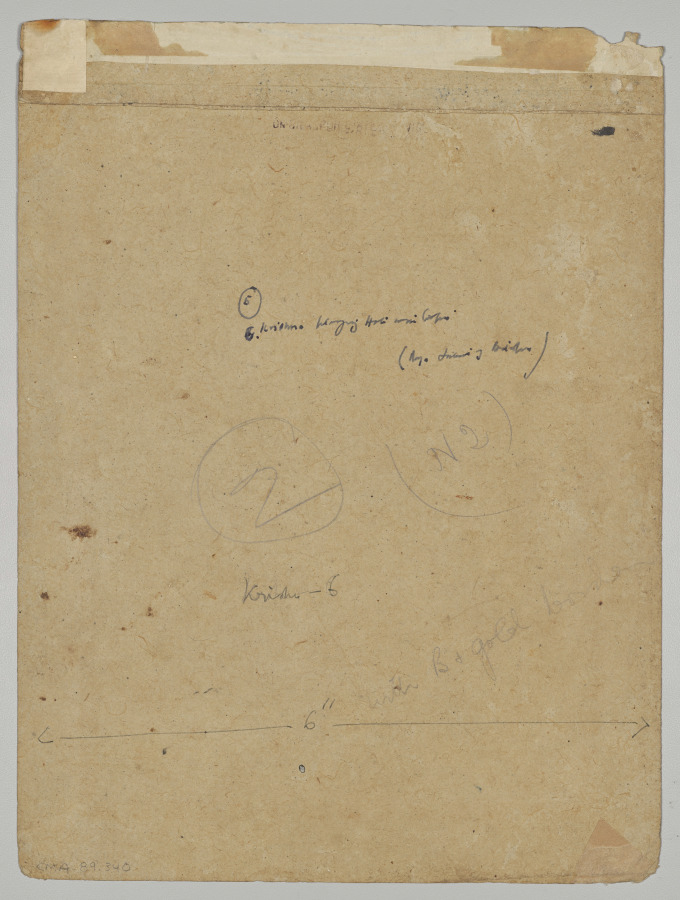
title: Radha and Hindu God Krishna celebrating the festival Holi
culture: Northern India, Pahari kingdoms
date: c. 1800–1810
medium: Gum tempera, ink, and gold on paper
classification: Painting